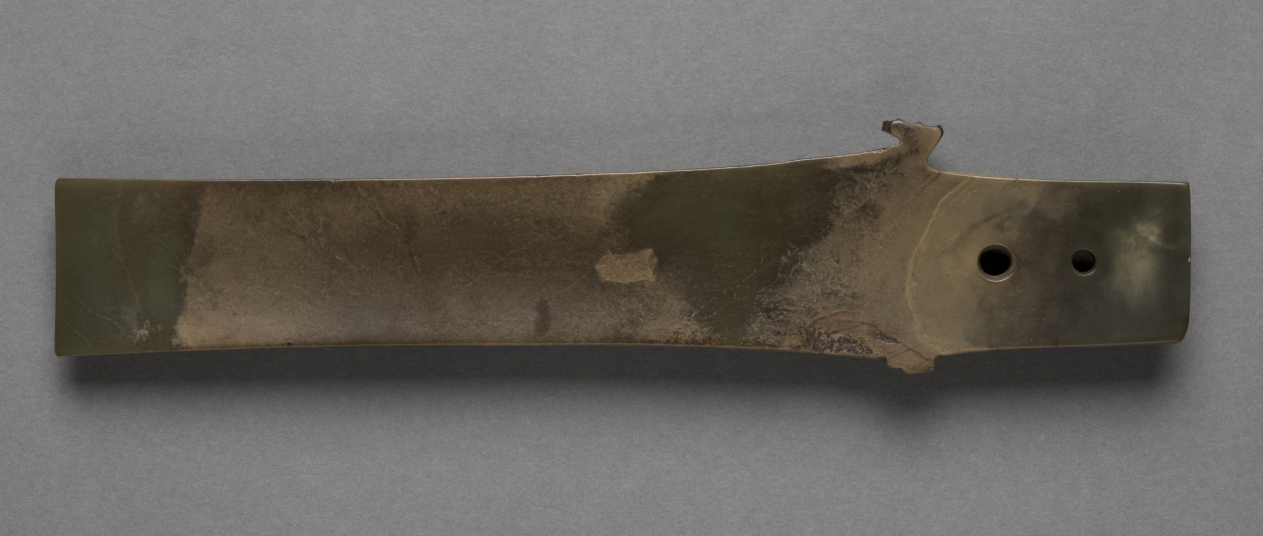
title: Ge (Dagger Axe)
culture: China, Neolithic period (3000s–2000s BCE) to Shang dynasty (c. 1766–1045 BCE)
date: c. 2500–1500 BCE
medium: nephrite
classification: Jade